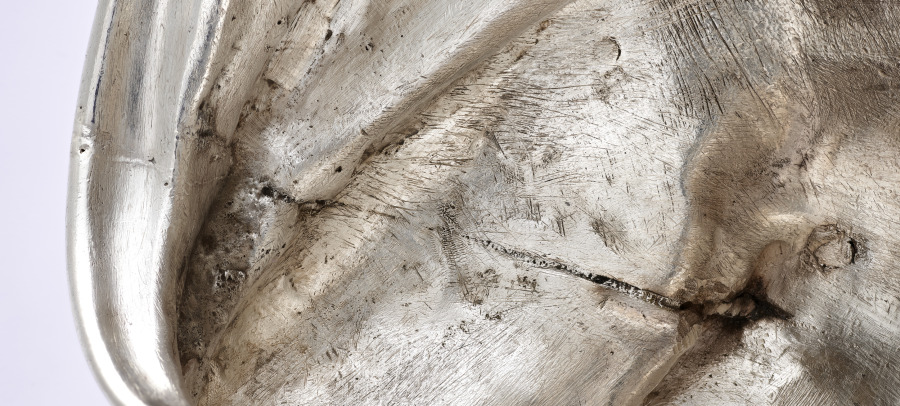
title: Tureen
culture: France, Paris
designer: Juste-Aurèle Meissonnier (French, 1695–1750)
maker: Pierre-François Bonnestrenne (French)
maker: Henry Adnet (French, 1745)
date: 1735–38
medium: silver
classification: Silver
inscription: engraved Meissonnier signature.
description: See entry for cover record 1977.182.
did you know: The langoustine, pigeon, and vegetables were cast using real examples giving the silver copies lifelike detail and appearance.